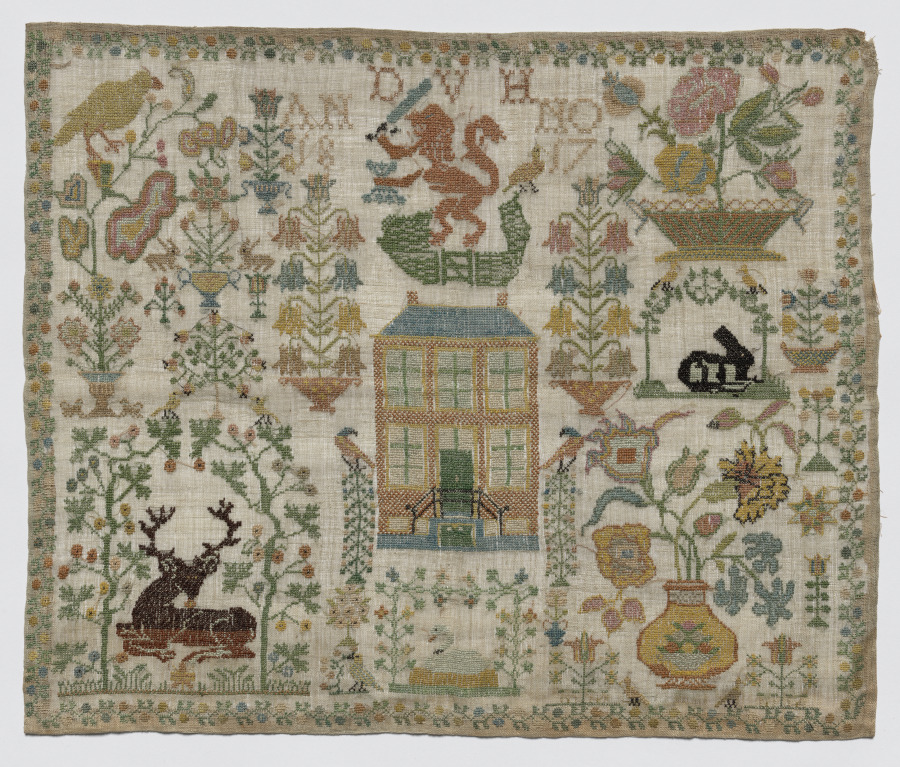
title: Sampler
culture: Netherlands, early 19th century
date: 1817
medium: embroidery; silk on woolen canvas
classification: Sampler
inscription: "D.V.H./ Anno 1817."